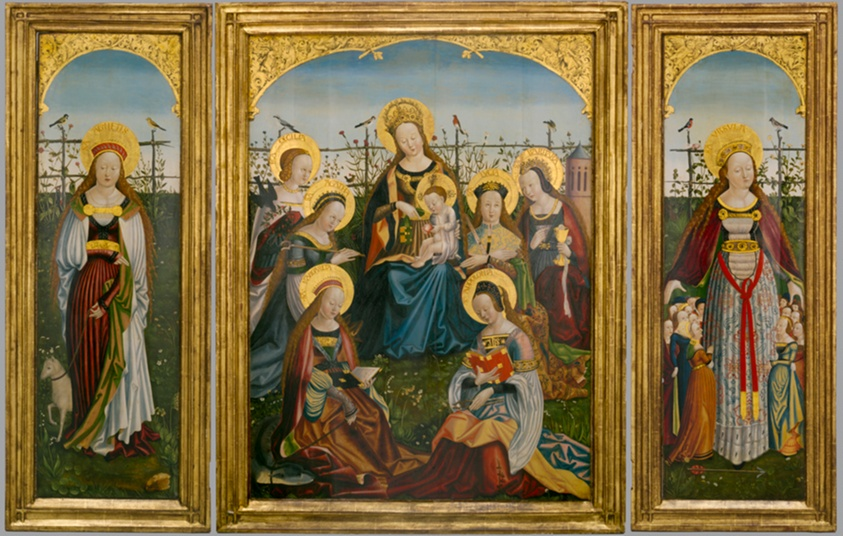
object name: Painting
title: Triptych of the Virgin and Child with Saints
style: 16th Century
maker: South German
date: c. 1510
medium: Oil and tempera on panel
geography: Germany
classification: triptych; painting; oil on panel; paint; tempera; european painting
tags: Century of Progress, woman with children, woman, women, Saint Margaret, Christian subjects, Christianity, garden, saints, Virgin and child/Madonna and child, Virgin Mary, world's fairs, Chicago World's Fairs